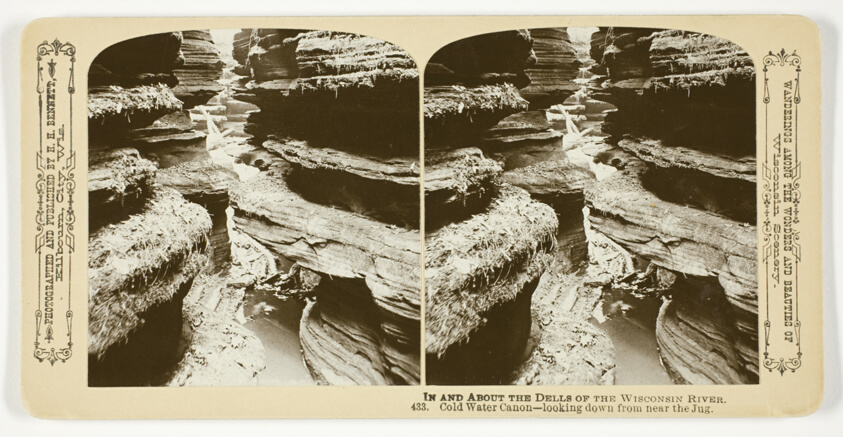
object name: Photograph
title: Cold Water Canon-looking down from near the Jug, No. 433 from the series "In and About the Dells of the Wisconsin River"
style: 19th century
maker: Henry Hamilton Bennett (American, born Canada, 1843–1908)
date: 1870/1908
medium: Albumen print, stereo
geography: United States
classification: stereograph (albumen); albumen silver print; photographic process; photography; photograph